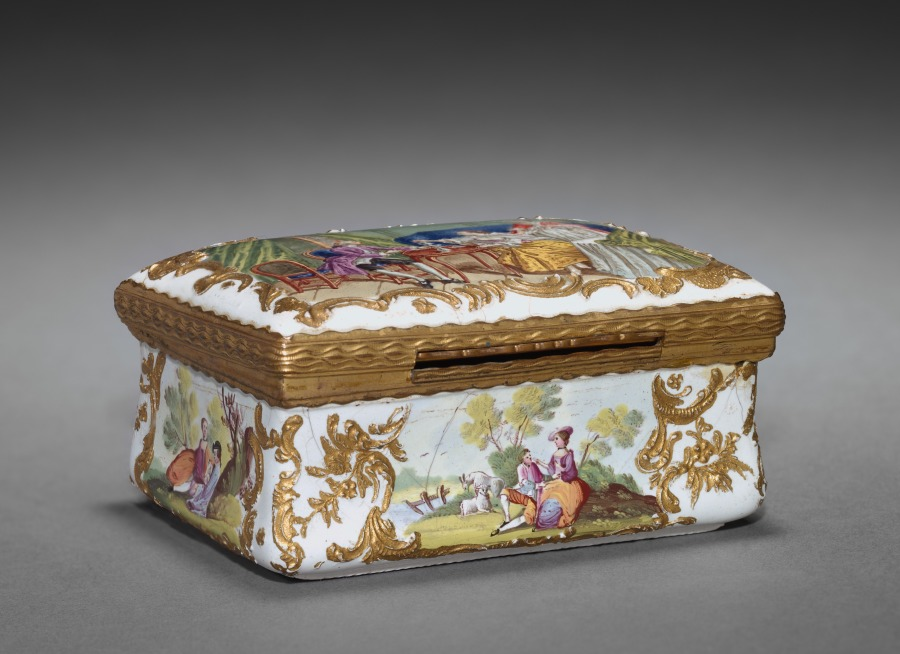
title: Box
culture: England, 18th century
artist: South Staffordshire Factory (British)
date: 1760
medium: enamel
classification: Enamel